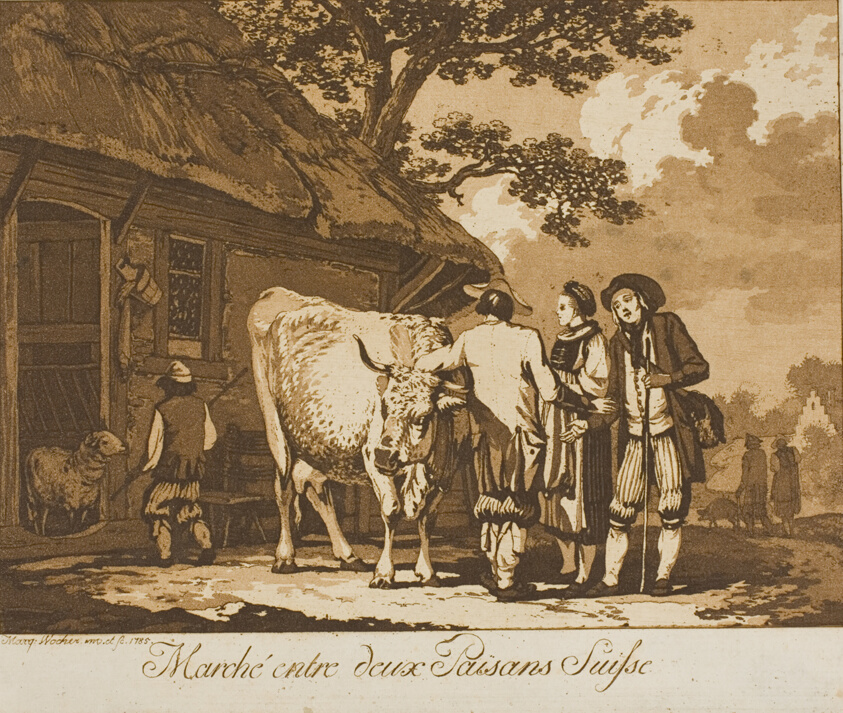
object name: Print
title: Two Swiss Peasants Bargaining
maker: Marquand Wocher; Swiss, 1760-1830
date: 1785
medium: Aquatint on paper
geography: Switzerland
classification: aquatint; print; prints and drawing